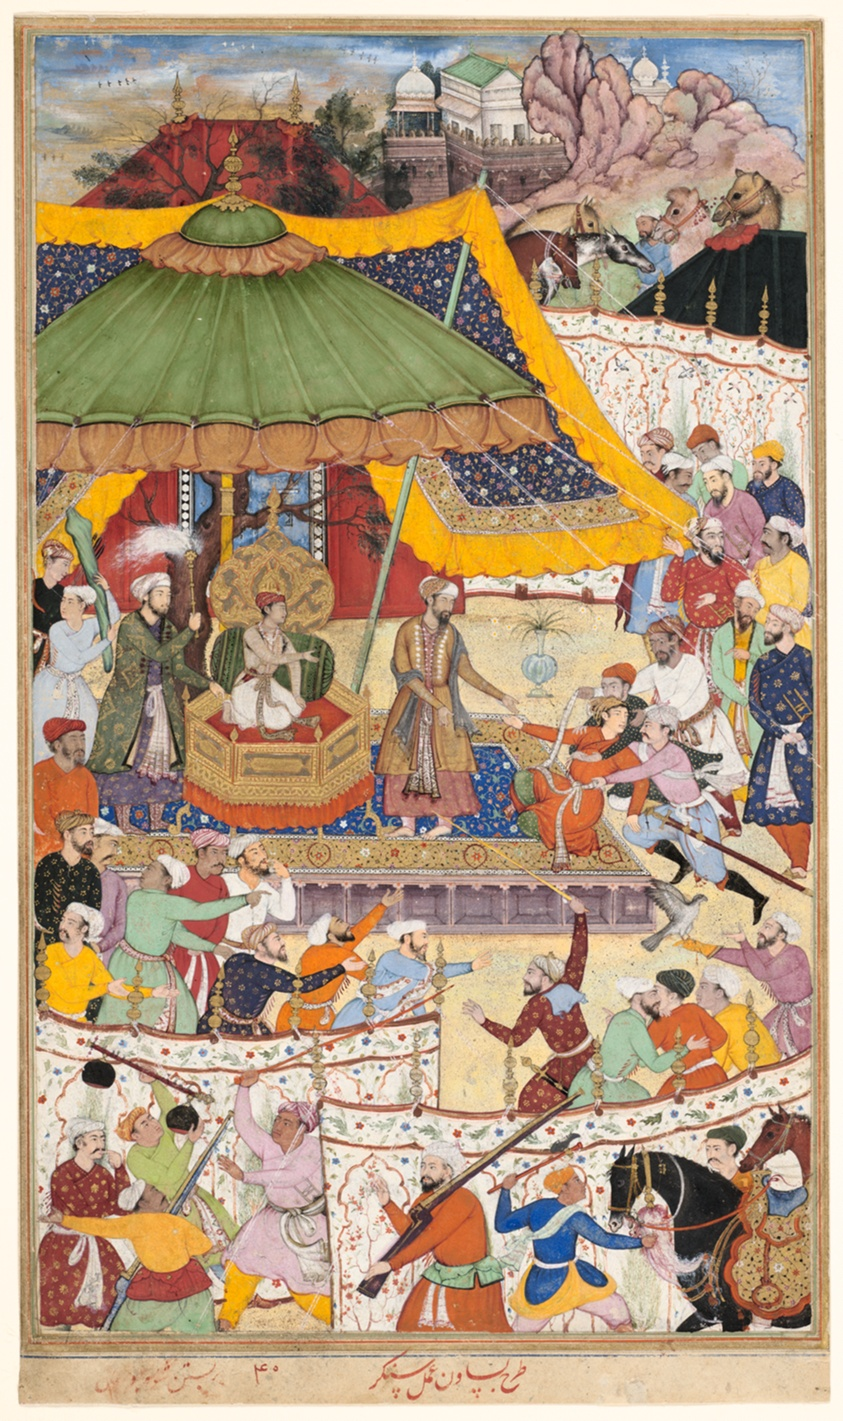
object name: Painting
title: The Young Emperor Akbar Arrests the Insolent Shah Abu’l-Maali, Page from a Manuscript of the Akbarnama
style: Islamic (culture or style), mughal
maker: India; Designed by Basawan, painted by Shankar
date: Mughal dynasty (1526-1857), c. 1590-1595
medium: Opaque watercolor and gold on paper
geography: India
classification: painting; asian art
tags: men, horses, animals, guns, swords, birds